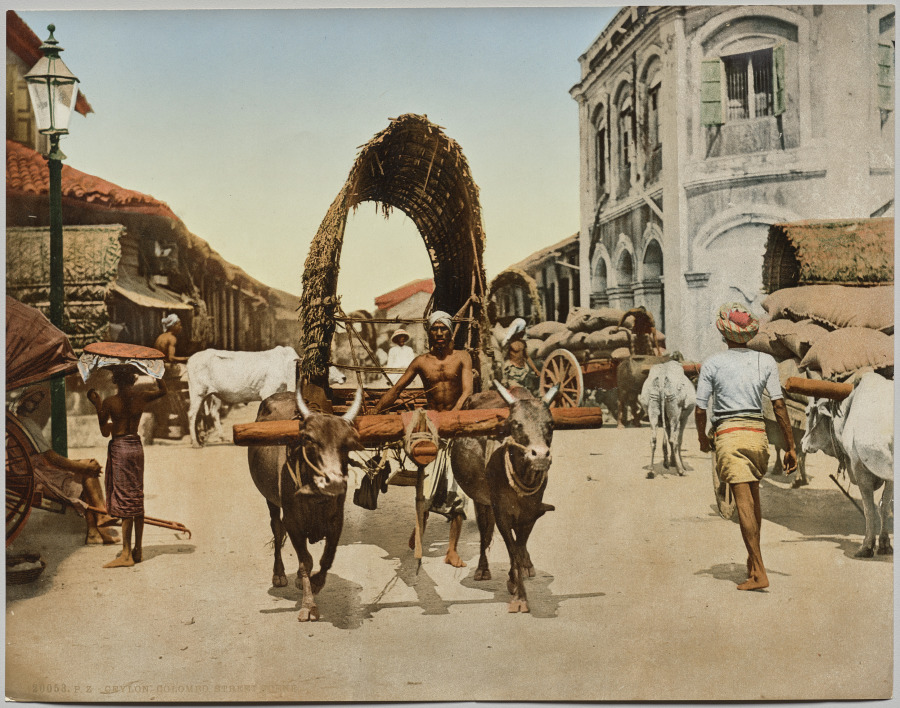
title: India. Ceylon. Colombo. Street Scene, after photo by Dr. Kurt Boeck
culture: India, 19th century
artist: Photoglob Co. (Zurich, active c. 1890–1910)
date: c. 1890–1910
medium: Photochrom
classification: Photograph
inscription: Imprinted in gold type on recto: “2003.P.Z-CALCUTTA. HARRISON ROAD.I”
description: To make a photochrom, a photographic negative was transferred onto a lithographic stone, then printers created a minimum of six and up to fifteen different stones, each with a single color of ink, which were printed atop the black-and-white image. The printers creating the colors had never seen the original locale. Photochroms were popular from the 1890s into the 1910s and were most often collected in albums or framed and hung on the wall.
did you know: This color image was made from a black-and-white negative.